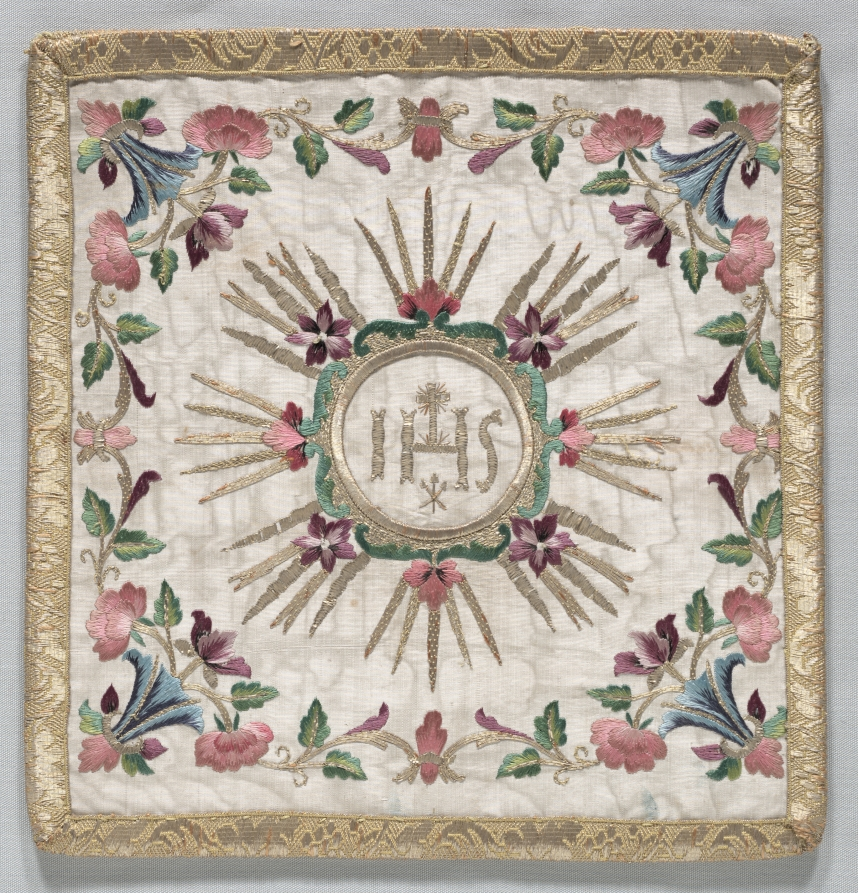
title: Pouch for the Chalice Cover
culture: Italy, 18th century or later copy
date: 1700s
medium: embroidered satin and silk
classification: Embroidery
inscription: in center: "I H" (Eta) "S" (Jesus).